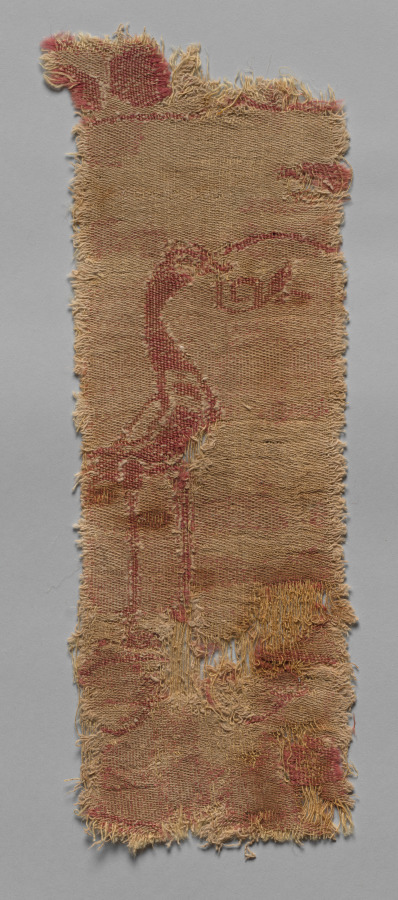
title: Fragment of Large Scale Roundel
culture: Iran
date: 600s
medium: compound twill; wool and cotton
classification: Textile